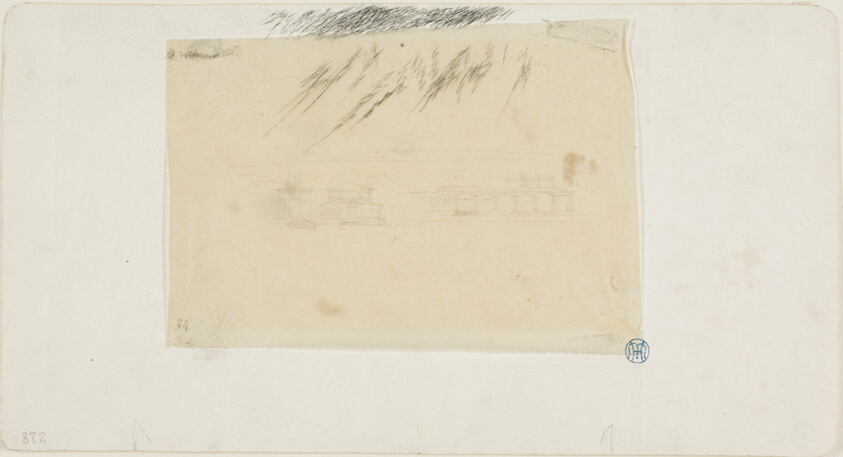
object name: Drawing and Watercolor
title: Study for Le Pont-au-Change (Pont-au-Change, Paris)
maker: Charles Meryon (French, 1821-1868)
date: 1854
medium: Graphite on transparent tissue paper, tipped on four corners to ivory wove paper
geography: France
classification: graphite; drawings (visual works); prints and drawing